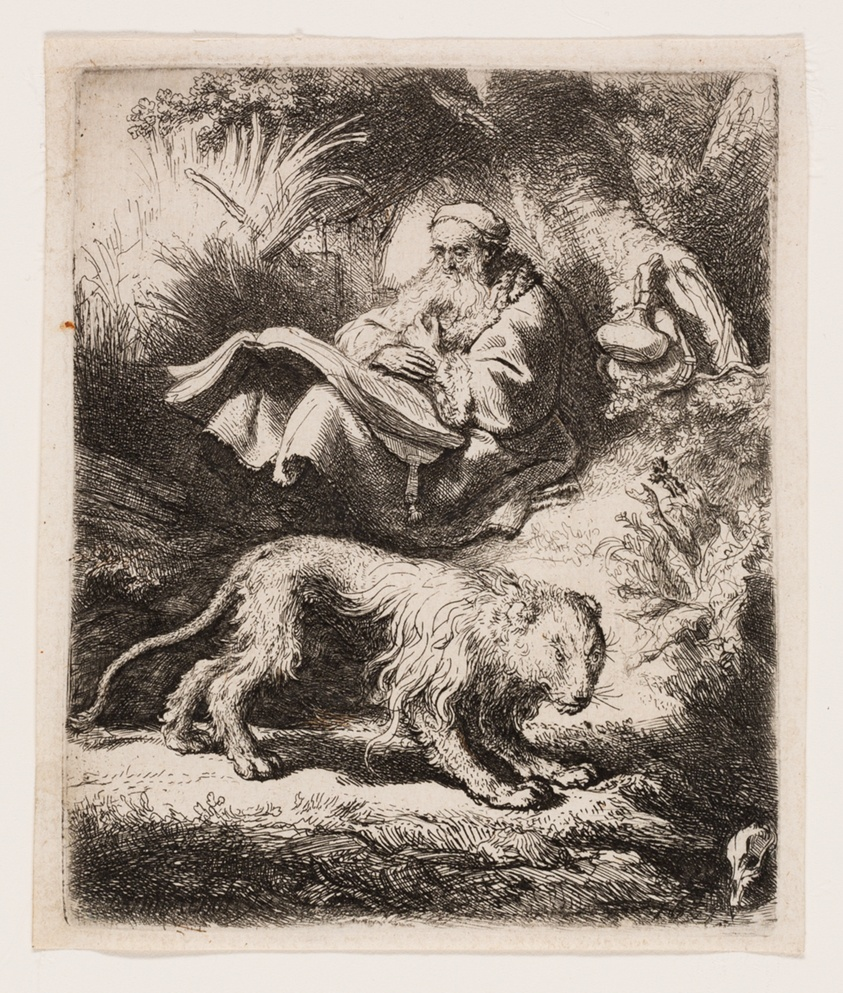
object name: Print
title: St. Jerome Reading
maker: Rembrandt van Rijn (Dutch, 1606-1669)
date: 1634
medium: Etching on ivory laid paper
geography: Holland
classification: etching; print; prints and drawing; paper